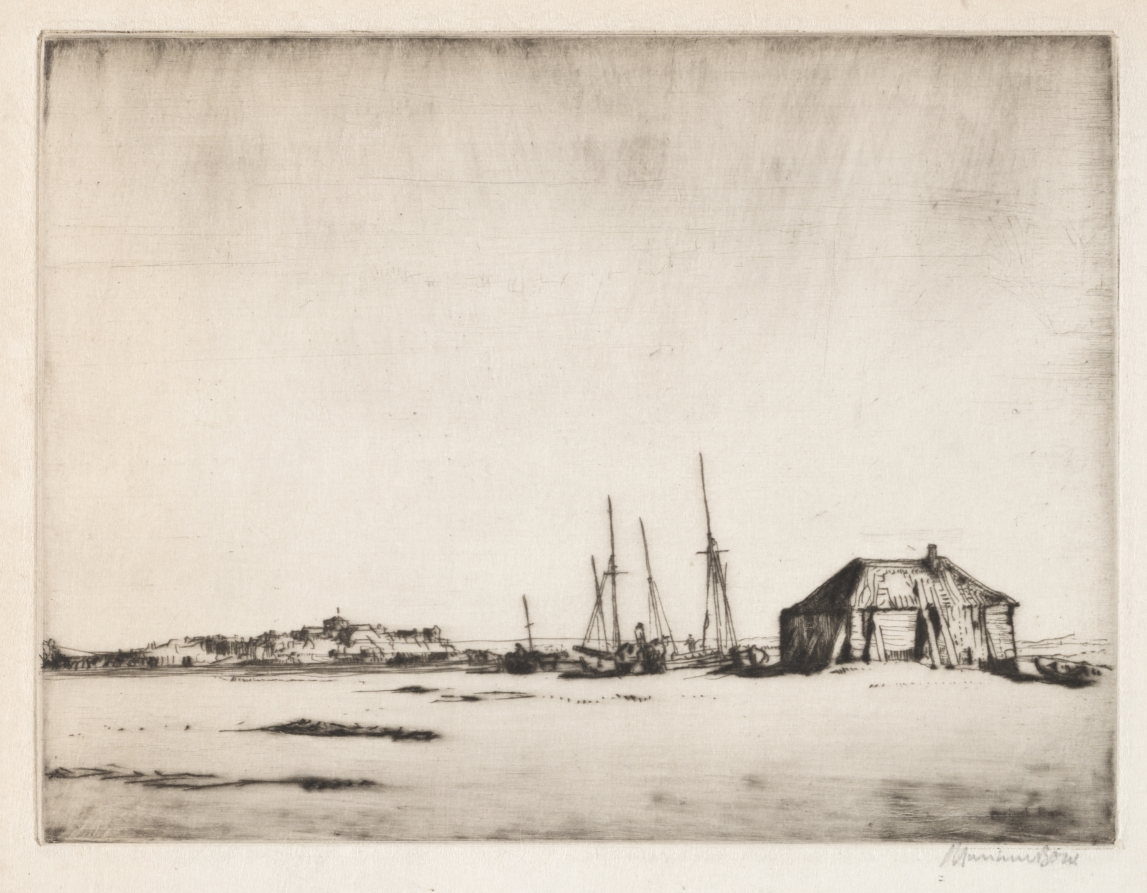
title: Rye, from Camber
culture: England, 20th century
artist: Muirhead Bone (British, 1876–1953)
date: 1907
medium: drypoint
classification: Print